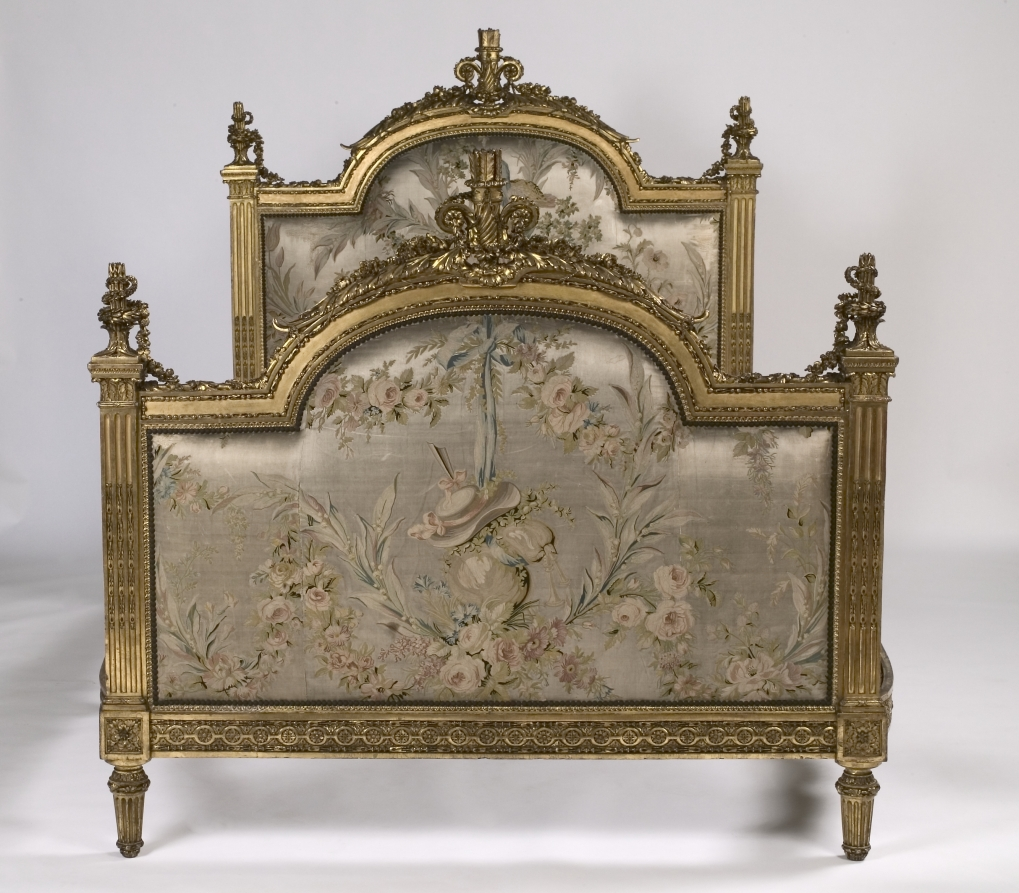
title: Bed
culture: France, 18th century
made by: attributed to Georges Jacob (French, 1739–1814)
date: 1700s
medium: gilded wood and embroidered satin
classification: Furniture and woodwork